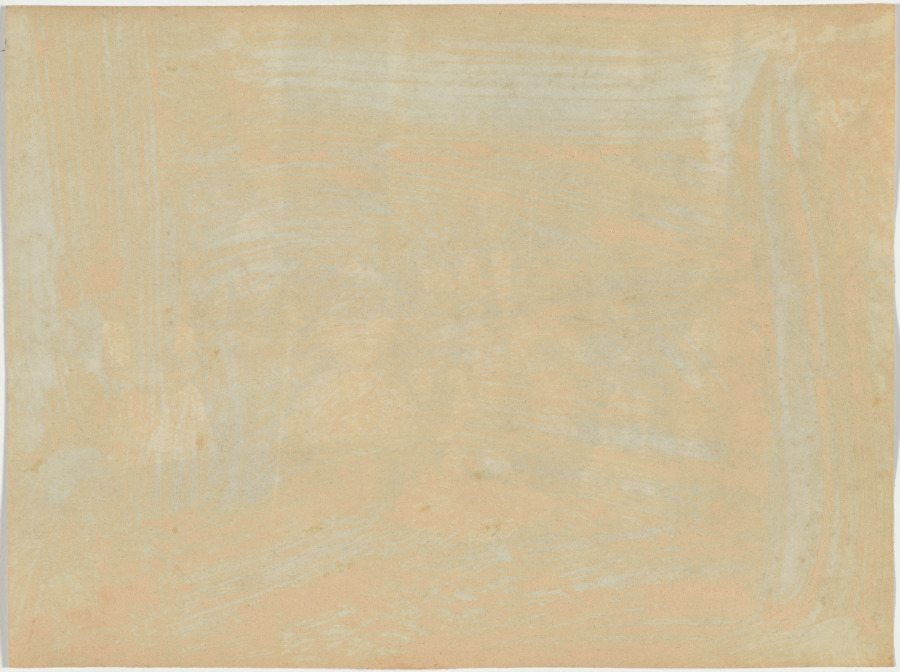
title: Fancy Group of Children, Indore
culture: India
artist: Raja Deen Dayal (Indian, 1844–1905)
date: 1886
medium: albumen print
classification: Photograph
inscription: No visible inscriptions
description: Children’s “fancy dress” or costume parties were also popular among the British during the Victorian era. Fairy tales inspired a number of the costumes shown here, including Little Red Riding Hood with basket and cape, Little Miss Muffet with a milking stool and bucket, and Little Bo Beep and her shepherd’s crook. Note the dog peeking out behind the girl on the right.